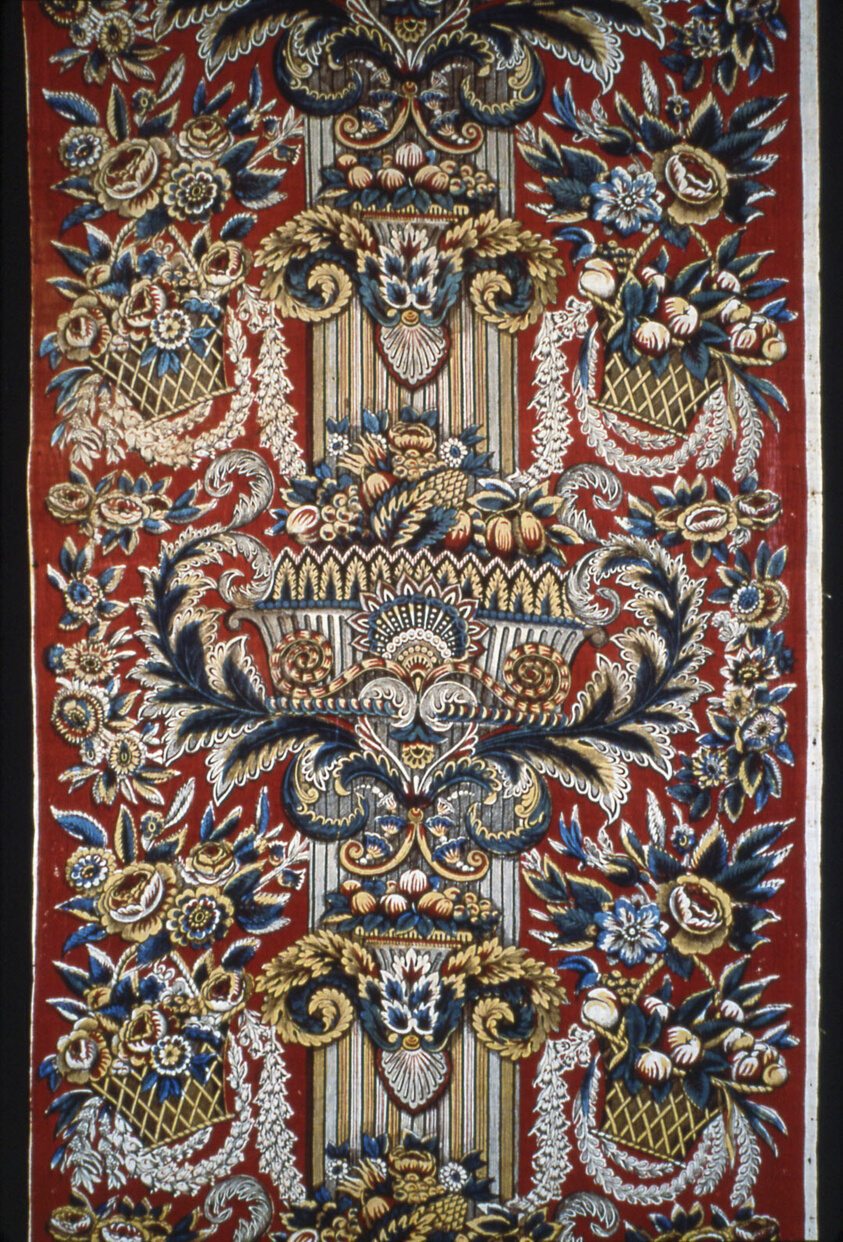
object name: Textile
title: Panel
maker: England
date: c. 1830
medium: Cotton, plain weave; engraved roller printed; glazed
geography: England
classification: textile; weaving - printed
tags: columns, baskets, foliage, flowers